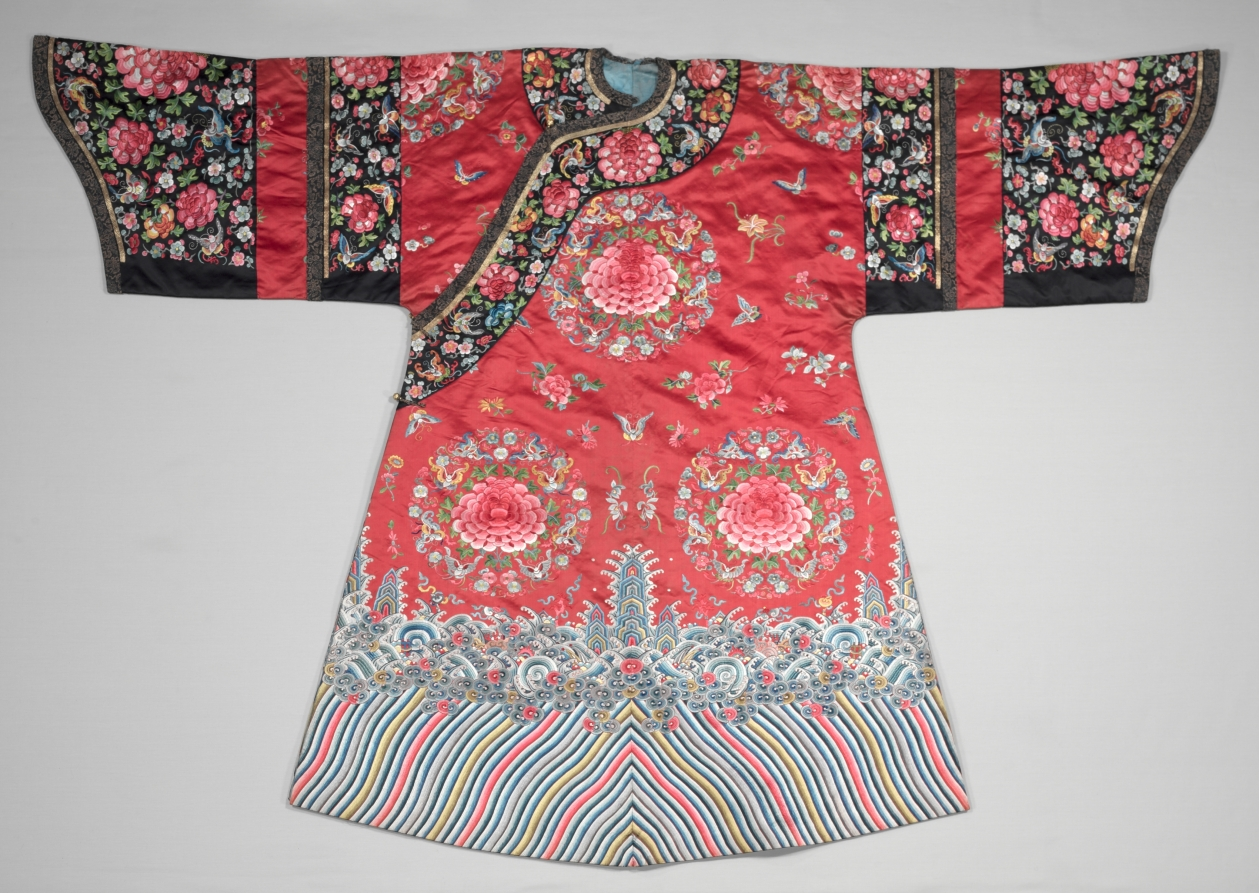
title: Ceremonial Robe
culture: China, Qing dynasty (1644-1911)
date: early 1900s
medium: Silk and gold thread: embroidery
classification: Garment